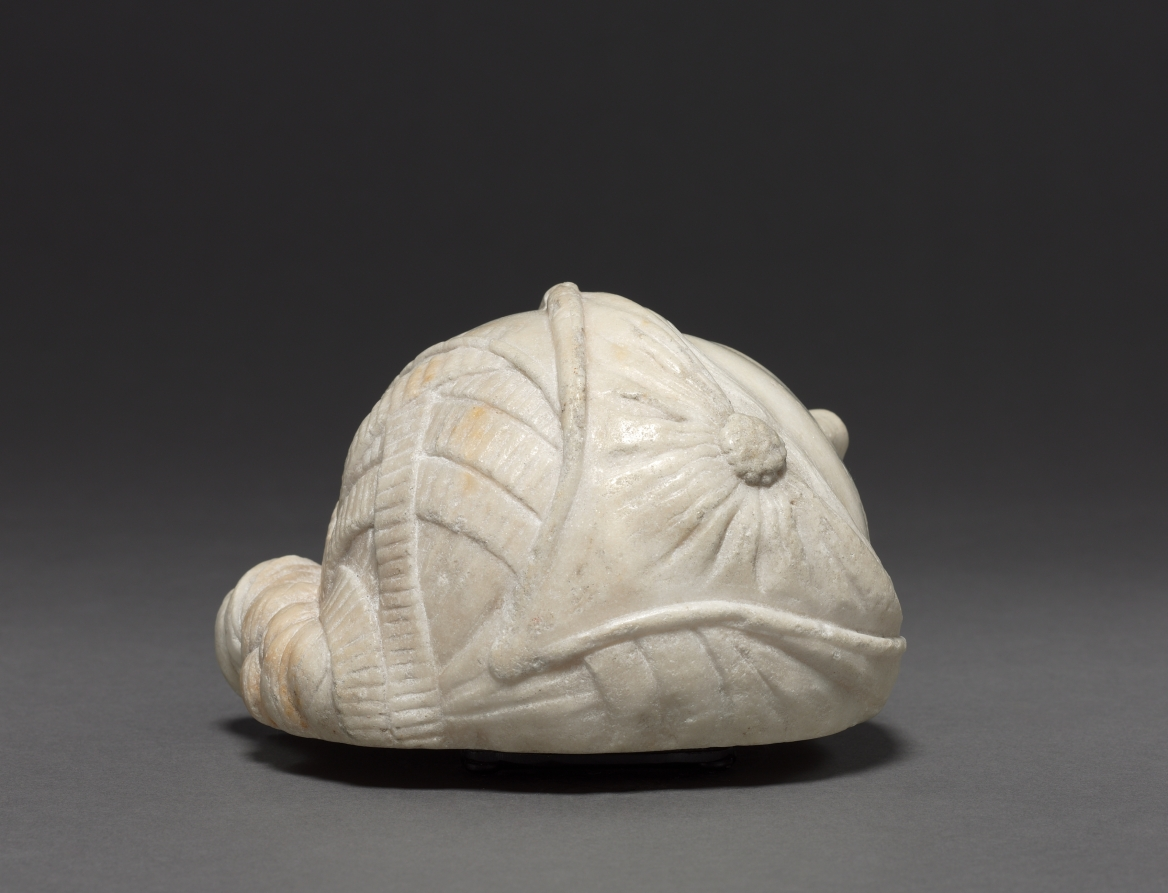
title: Head of a Woman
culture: France, 15th century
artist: circle of Michel Colombe (French, c. 1430–c. 1513)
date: c. 1500–1525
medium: marble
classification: Sculpture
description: The original context and function of these two marble heads are unknown. They are presumed to have been part of a relief sculpture from a château, perhaps in the Loire region, or else from a tomb sculpture. Their style is reminiscent of sculptures produced by Michel Colombe, a prominent sculptor active in the Loire Valley in the service of aristocratic and royal patrons, and may have been carved by a close follower or member of his workshop.